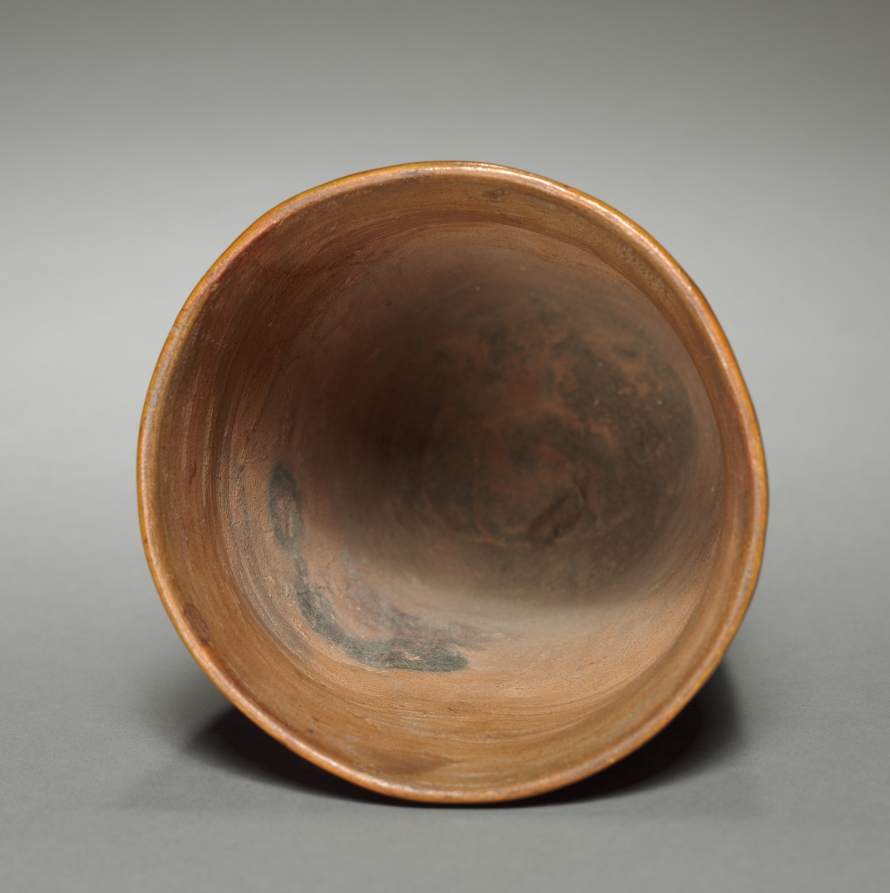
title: Kero-shaped Vessel (modern version of a Wari-style vessel)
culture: Peru, modern, 20th century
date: before 1955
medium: pottery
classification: Forgery